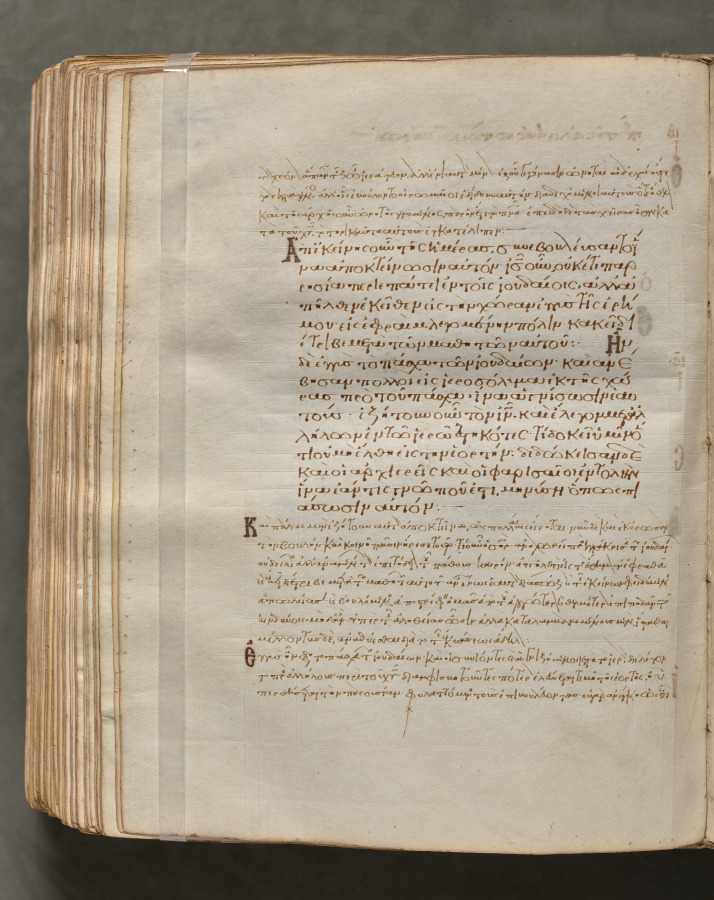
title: Text, folio 381 (verso), from a Gospel Book with Commentaries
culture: Byzantium, Constantinople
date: c. 1000–1100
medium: ink, tempera, and gold on vellum; leather binding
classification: Bound Volume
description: Each of the four gospels in this book opens on a page with brilliantly illuminated borders depicting the author of the text as well as birds—principally peacocks, symbols of the immortality of the soul—and fountains, representing the fountain of life and the salvation of the soul. This volume consists of 428 leaves with texts in Greek. Its level of sophistication suggests that it was probably written and decorated in a monastery in Constantinople.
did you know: Gospel books were carried in procession through Byzantine churches.